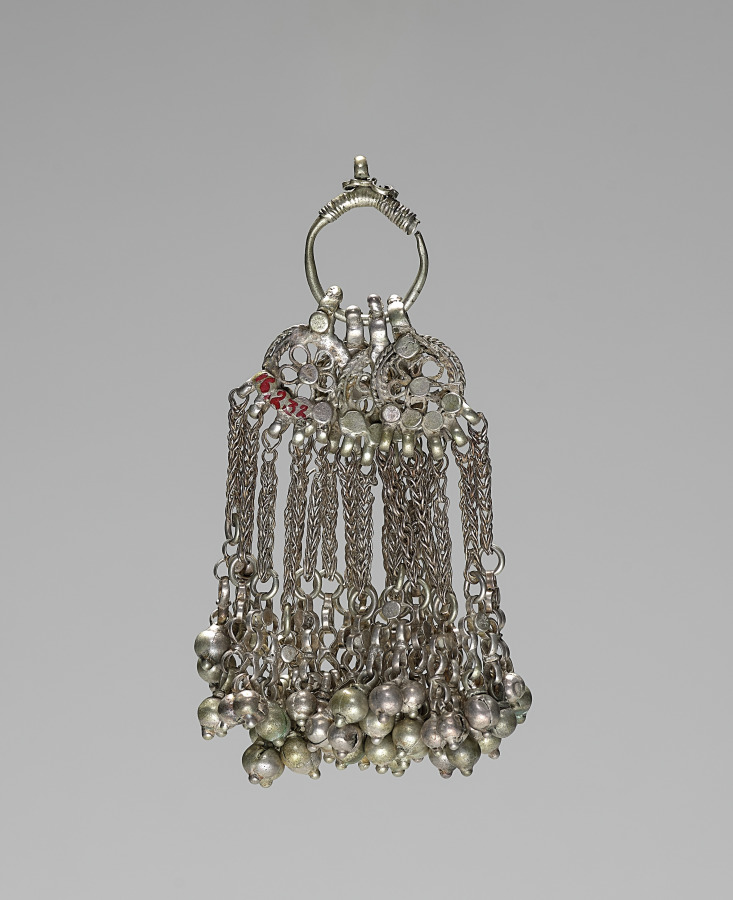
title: Earring (?)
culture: India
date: before 1916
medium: silver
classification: Jewelry